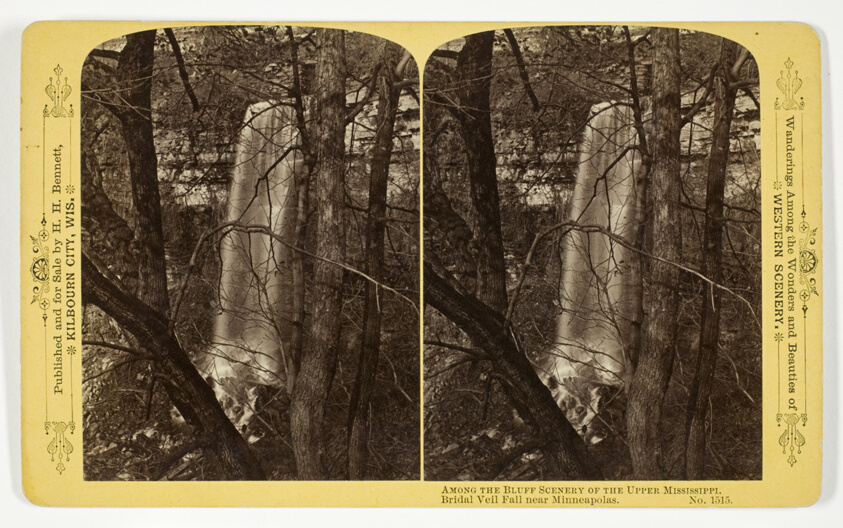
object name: Photograph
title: Bridal Veil Fall near Minneapolis, No. 1515 from the series "Among the Bluff Scenery of the Upper Mississippi"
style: 19th century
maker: Henry Hamilton Bennett (American, born Canada, 1843-1908)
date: 1870/1908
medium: Albumen print, stereo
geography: Wisconsin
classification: photography; photograph; albumen silver print; stereograph (albumen)